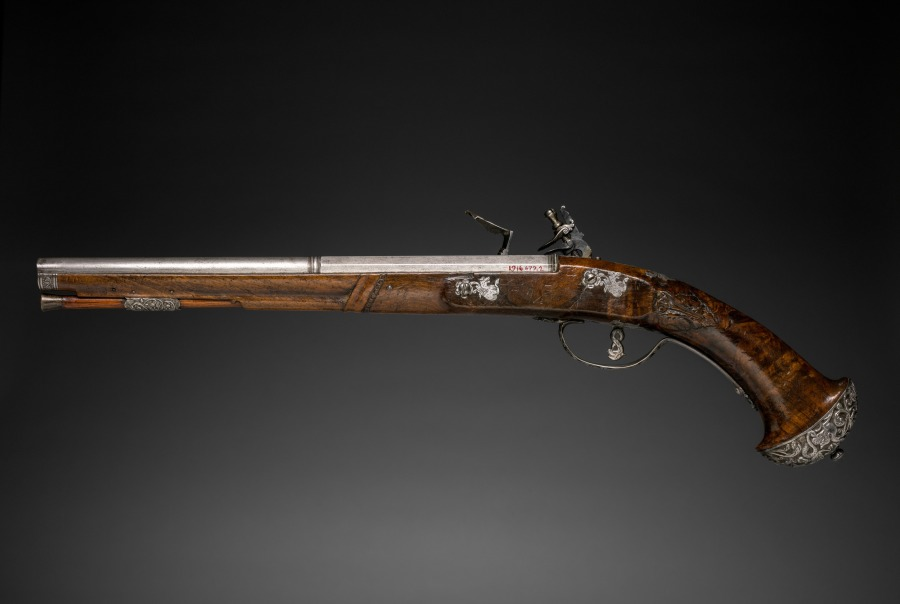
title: Flintlock Pistol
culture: Italy, Brescia, late 17th century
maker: Gio Borgognone (Italian)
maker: Lazarino Cominazzo (Italian)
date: c. 1690–1700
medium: steel, chiseled steel with walnut stock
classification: Arms and Armor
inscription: barrel signed: Lazarino Cominazzo; lockplates signed: Gio Borgognone in Bresia